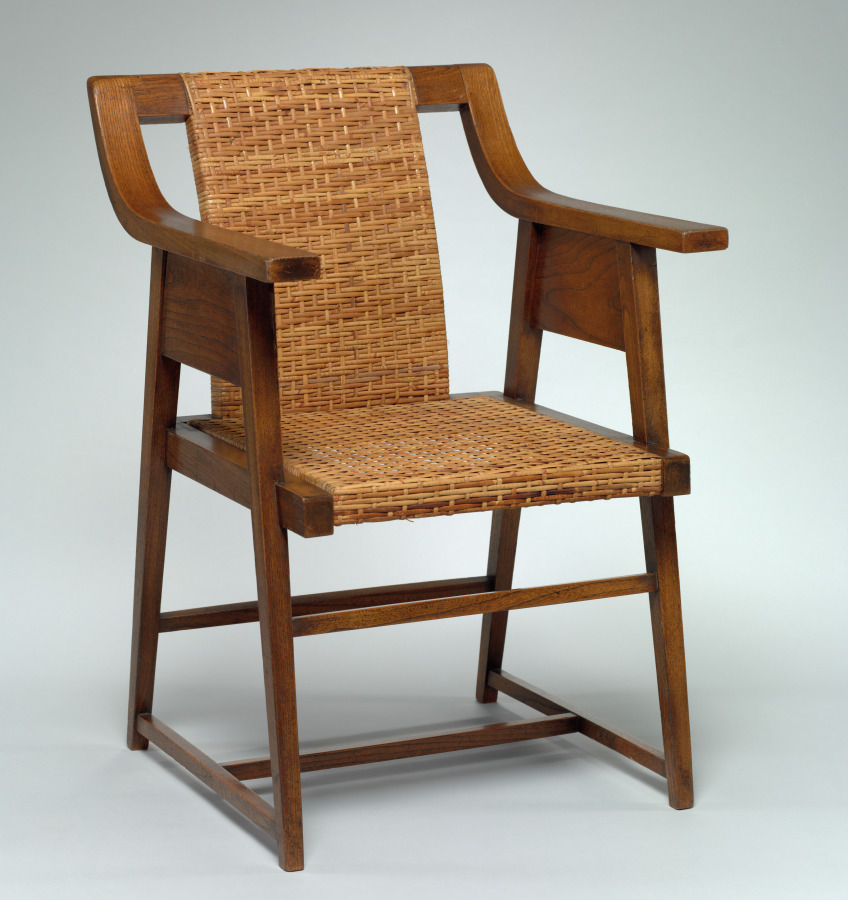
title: Armchair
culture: Austria, Vienna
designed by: Hans Vollmer (Austrian, 1879-)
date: c. 1904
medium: oak with replacement upholstered slip seat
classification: Furniture and woodwork